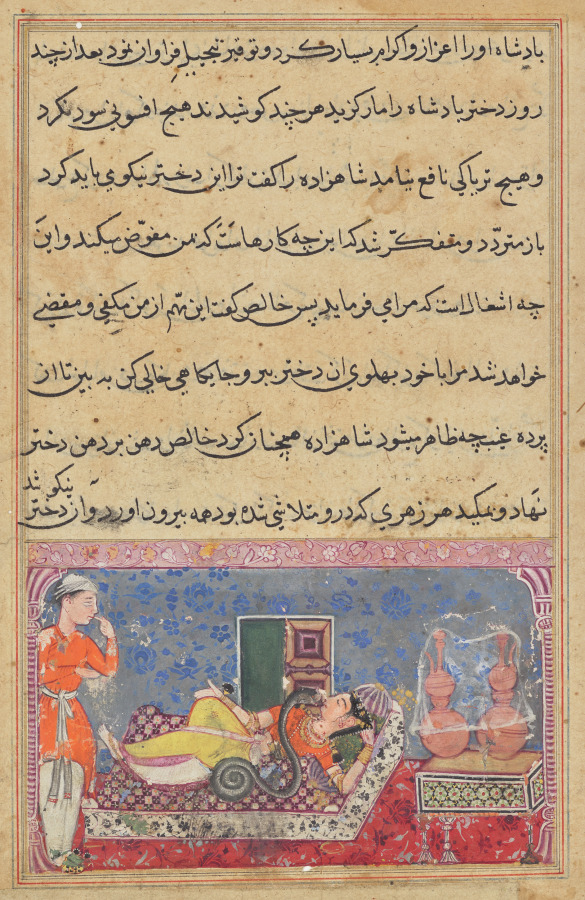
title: Khalis repays the prince for his kindness by changing into a snake and sucking the poison from the king’s daughter, from a Tuti-nama (Tales of a Parrot): Eighteenth Night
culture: Mughal India, court of Akbar (reigned 1556–1605)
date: c. 1560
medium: gum tempera, ink, and gold on paper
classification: Painting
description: The prince looks on in amazement as his snake companion resumes his original form and saves the life of the princess, who was dying from a poisonous snake bite. The snake owed the prince a favor, since the prince had cut a piece of his own flesh to feed him and his mate. After the girl was restored to health, the prince married her and became viceroy to the king. His three companions, Good Fortune, the snake, and the frog, having fulfilled their obligation, then bid him farewell.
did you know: The prince later marries the king’s daughter and becomes a viceroy.